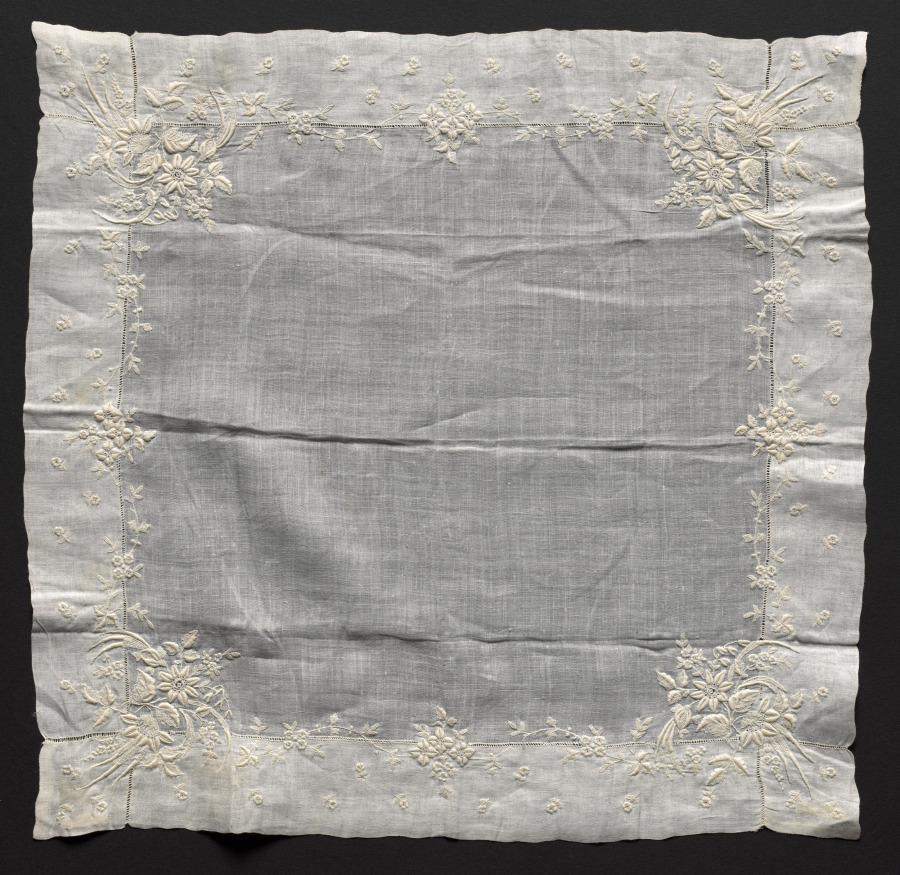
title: Embroidered Handkerchief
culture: Switzerland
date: 1880–99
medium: Plain weave linen: embroidered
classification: Embroidery